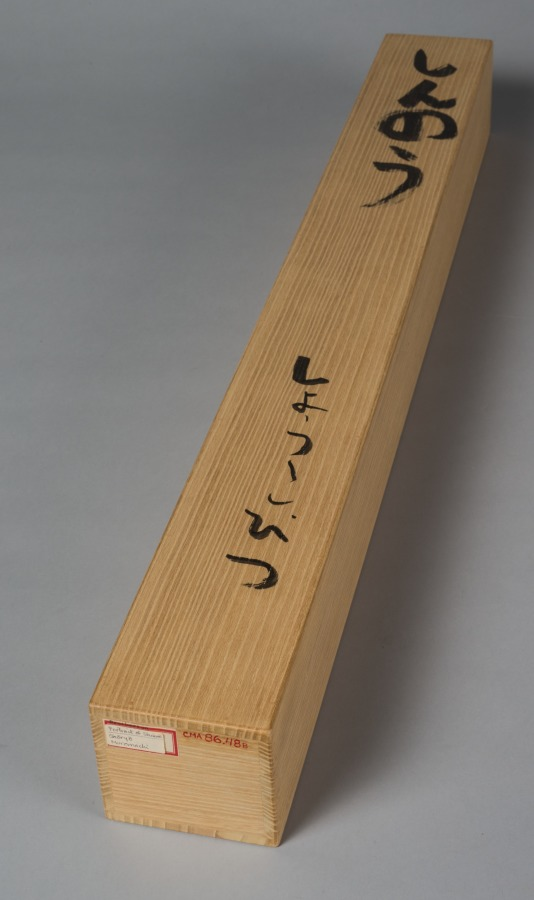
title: Shennong (Shinnō)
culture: Japan, Muromachi period (1392–1573)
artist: Shōryō (Japanese)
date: late 1400s–early 1500s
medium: hanging scroll; ink on paper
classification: Painting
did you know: Shennong legendarily taught people how to farm and also how to use plants as medicine.